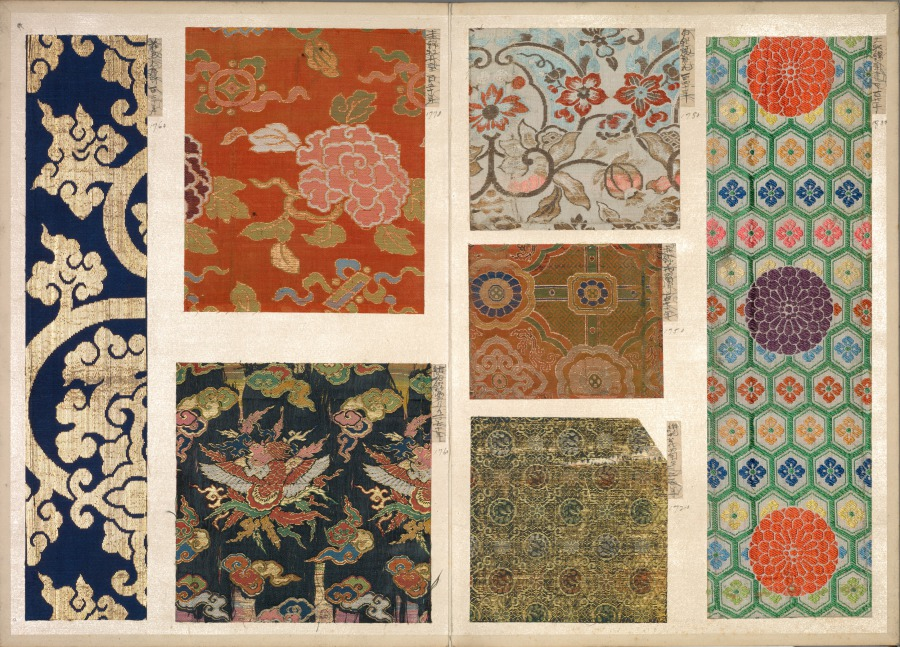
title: Album of Textile Samples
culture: Japan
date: 1790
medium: silk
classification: Textile